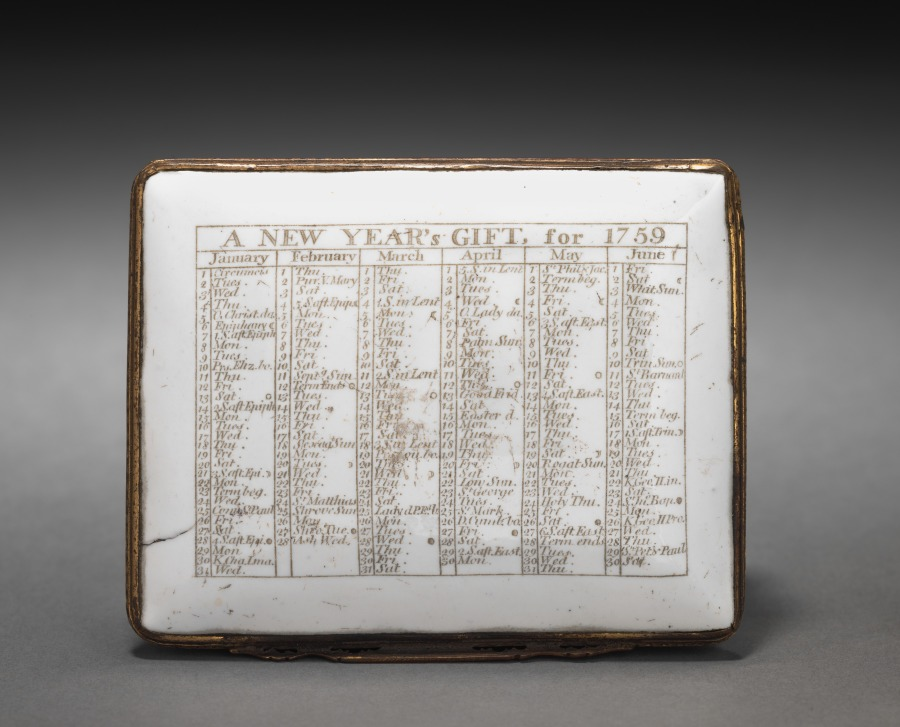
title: Snuff Box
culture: England, Birmingham, mid-18th Century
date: 1759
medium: enamel on copper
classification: Enamel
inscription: Dated: "1759"